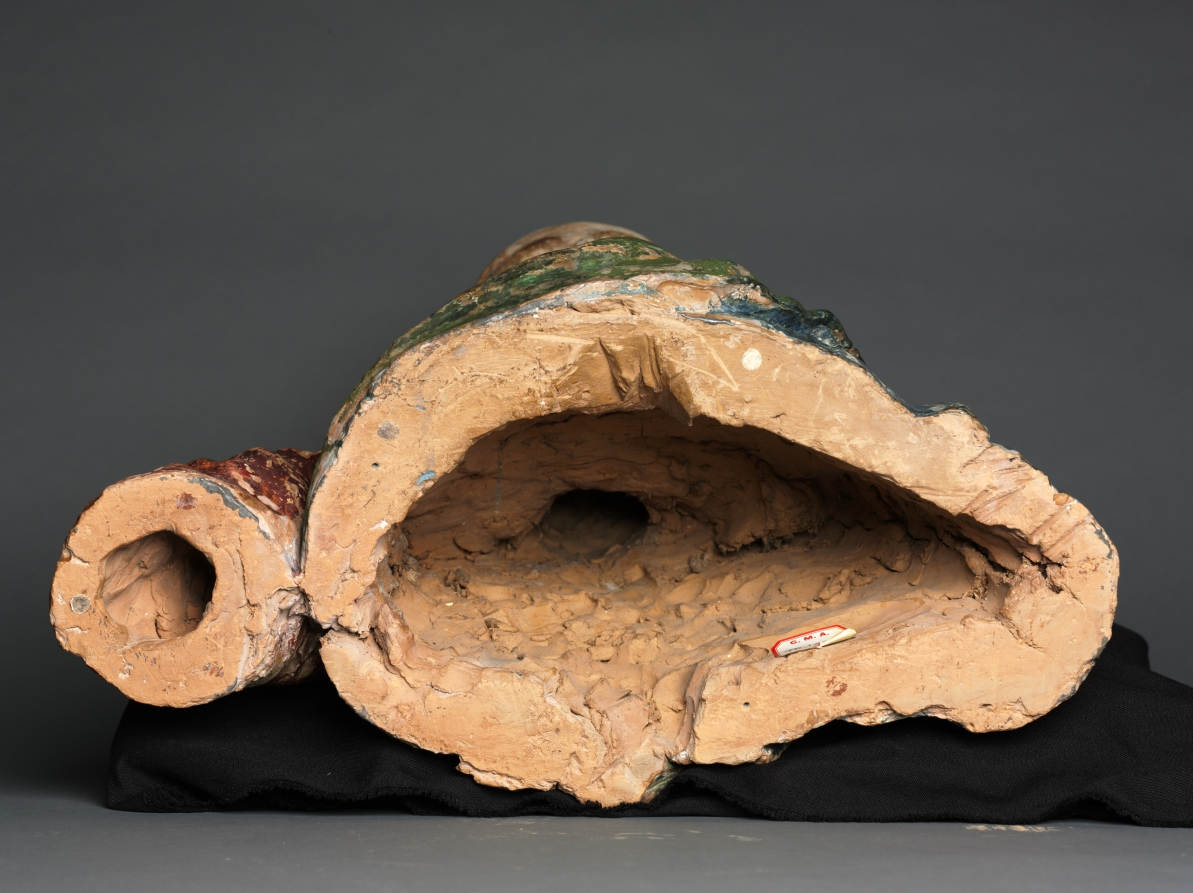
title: Bust of Christ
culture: Italy, Florence, 15th century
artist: workshop of Andrea del Verrocchio (Italian, 1435–1488)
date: c. 1470–1500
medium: painted terracotta and wood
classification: Sculpture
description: In the late 1400s Andrea del Verrochio set up a large workshop where he and his assistants reproduced copies of his sculpture and other works for a middle-class market. Originality was not the objective; in fact, most people were only interested in purchasing replicas of well-known works. This sculpture was modeled after Verrocchio's Christ figure in the bronze sculpture group Christ and St. Thomas at Orsanmichele in Florence, Italy. The medium of terracotta, which was cheaper than bronze or marble, made it possible to offer copies at a reasonable price. Additionally, workshop practices reduced the cost of the work by reducing labor time. Assistants were usually responsible for the shaping of the torso and garments, while Verrocchio was often in charge of executing the facial features and hair. In this sculpture the torso is out of proportion, and the general discrepancy in quality between the parts of the sculpture is due to the fact that it is a workshop production. Given that the facial features are so well executed and the statue retains a stirring motional quality, a trademark of Verrocchio's style which artists found hard to duplicate, it is probable that this sculpture was made in Verrocchio's studio, possibly even with active involvement by the artist on the head.